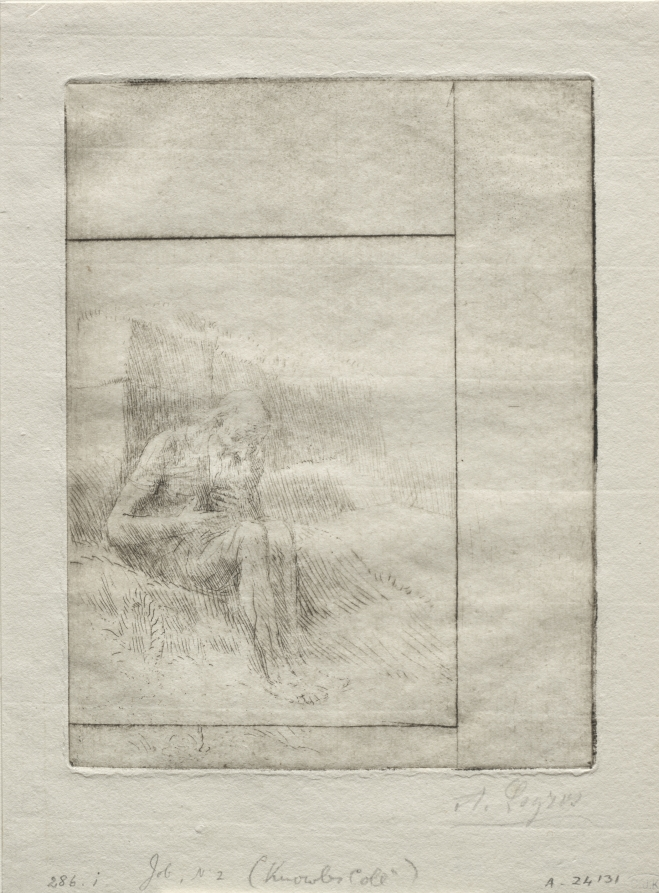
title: Job (2nd Plate)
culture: France, 19th-20th century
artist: Alphonse Legros (French, 1837–1911)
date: c. 1857–1911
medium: etching and drypoint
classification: Print